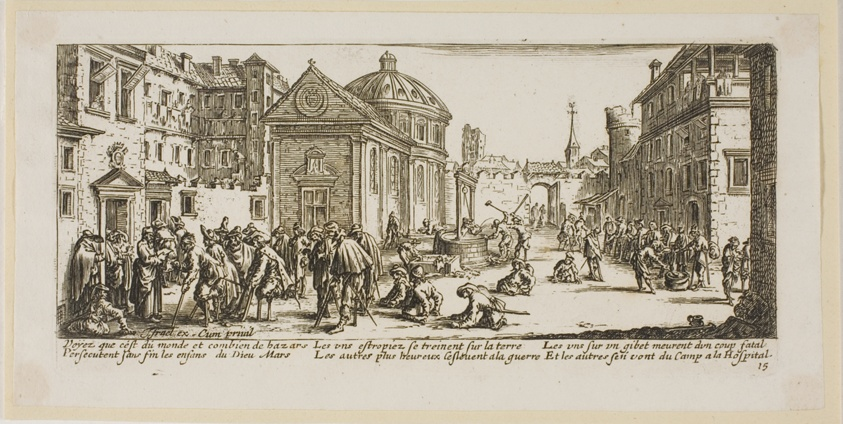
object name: Print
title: The Hospital, plate fifteen from The Large Miseries of War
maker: Gerrit Lucasz van Schagen (Dutch, born 1642); after Jacques Callot (French, 1592-1635)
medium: Etching on paper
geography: Netherlands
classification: etching; print; prints and drawing